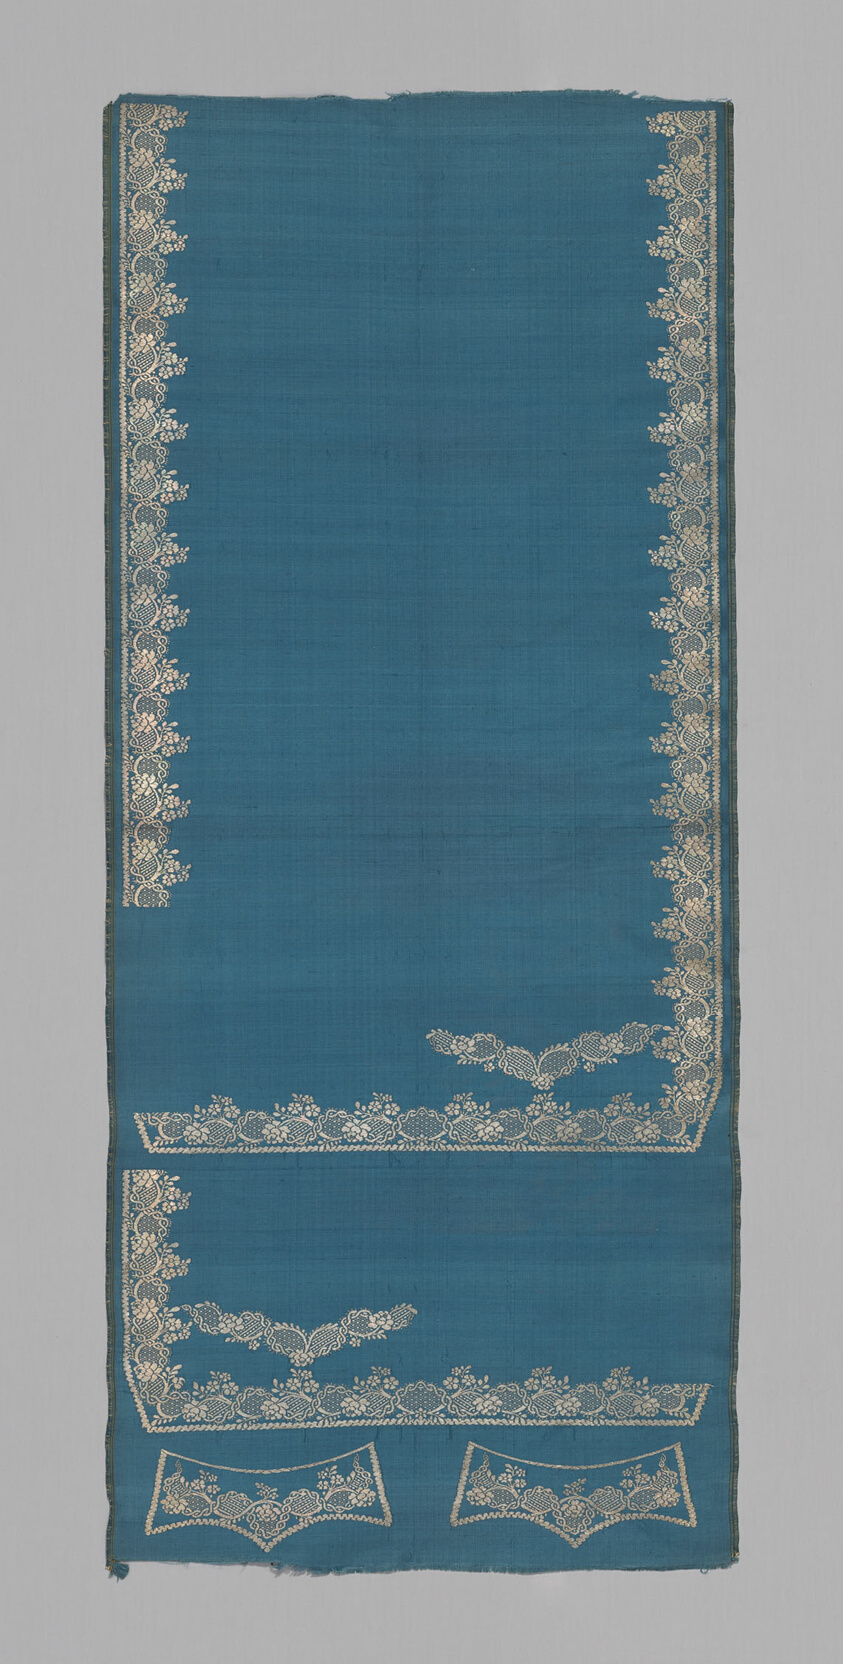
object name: Costume and Accessories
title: Uncut Waistcoat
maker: France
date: 1750s/60s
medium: Silk and silvered-metal-strip-wrapped silk, plain weave with supplementary brocading wefts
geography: France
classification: textile; costume - weaving; weaving; costume